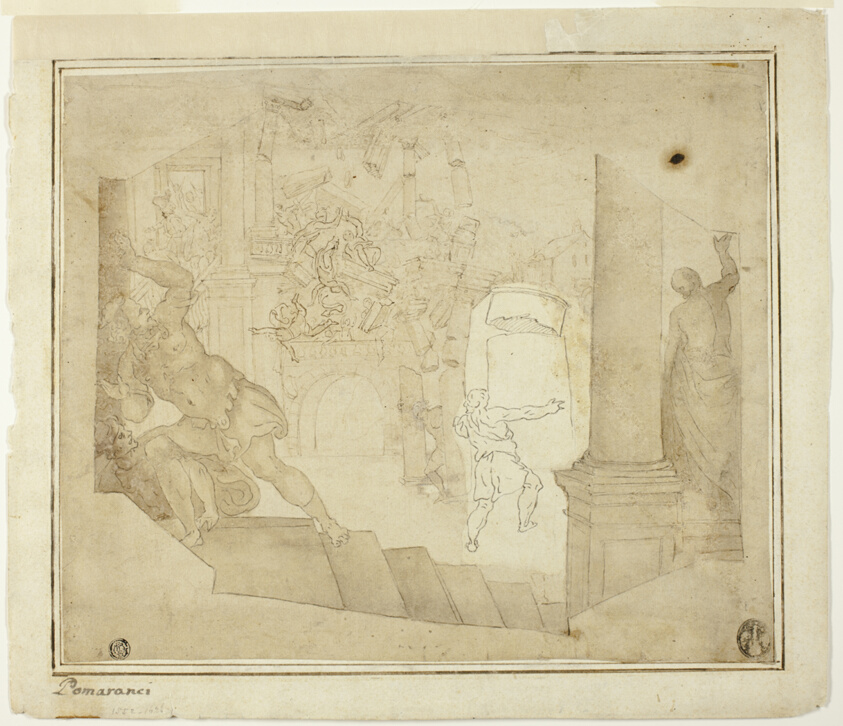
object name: Drawing and Watercolor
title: Death of Samson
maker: probably Italian; Late 16th Century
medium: Pen and brown ink with brush and brown wash, over black chalk, on ivory laid paper, laid down on ivory laid paper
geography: Italy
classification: ink with wash; drawings (visual works); prints and drawing